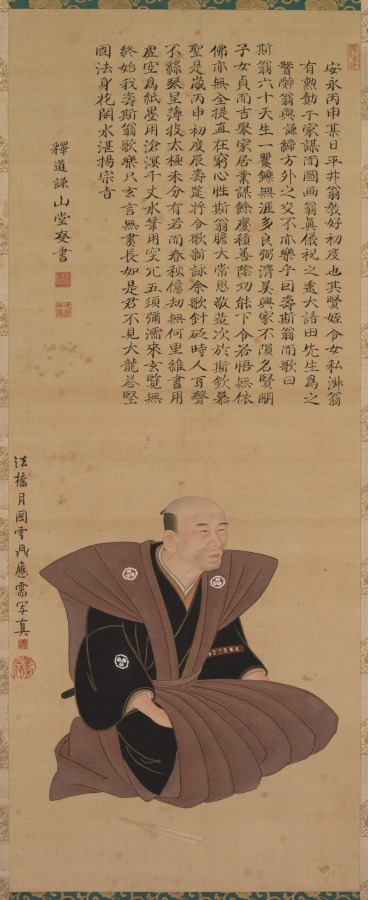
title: Pair of Portraits of Samurai-Officials: Hirai Kyosei and Hirai Rinsei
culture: Japan, Edo period (1615–1868)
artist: Sando Hyosho (Japanese)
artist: Tsukioka Settei (Japanese, 1710–1786)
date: 1776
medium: hanging scrolls; ink and color on silk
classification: Painting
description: In this pair of figure paintings, the artist provided generational portraits of two clan leaders from the Hirai family, accompanied by lengthy inscriptions in a distinctive calligraphic style from separate scholar-officials.